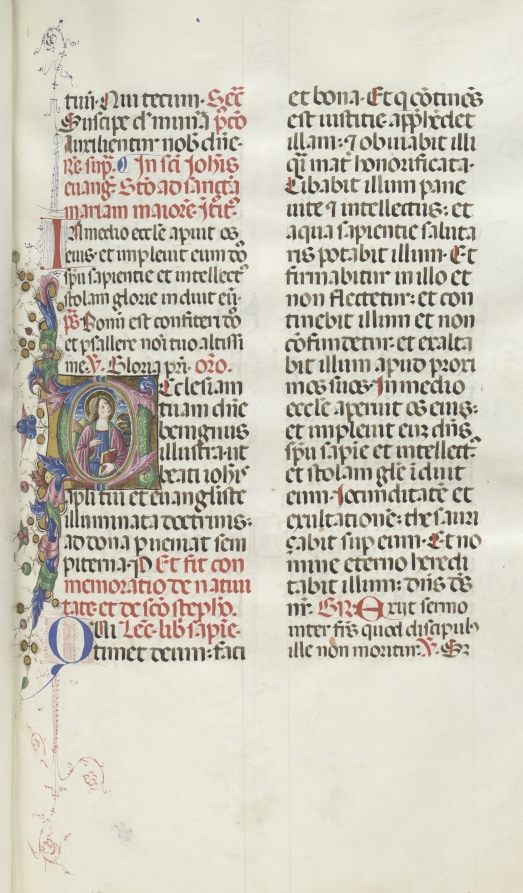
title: Missale: Fol. 25: Saint John with Eagle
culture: Italy, Perugia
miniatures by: Bartolommeo Caporali (Italian, c. 1420–1503)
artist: assisted by Giapeco Caporali (Italian, d. 1478)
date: 1469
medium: ink, tempera and burnished gold on vellum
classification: Bound Volume